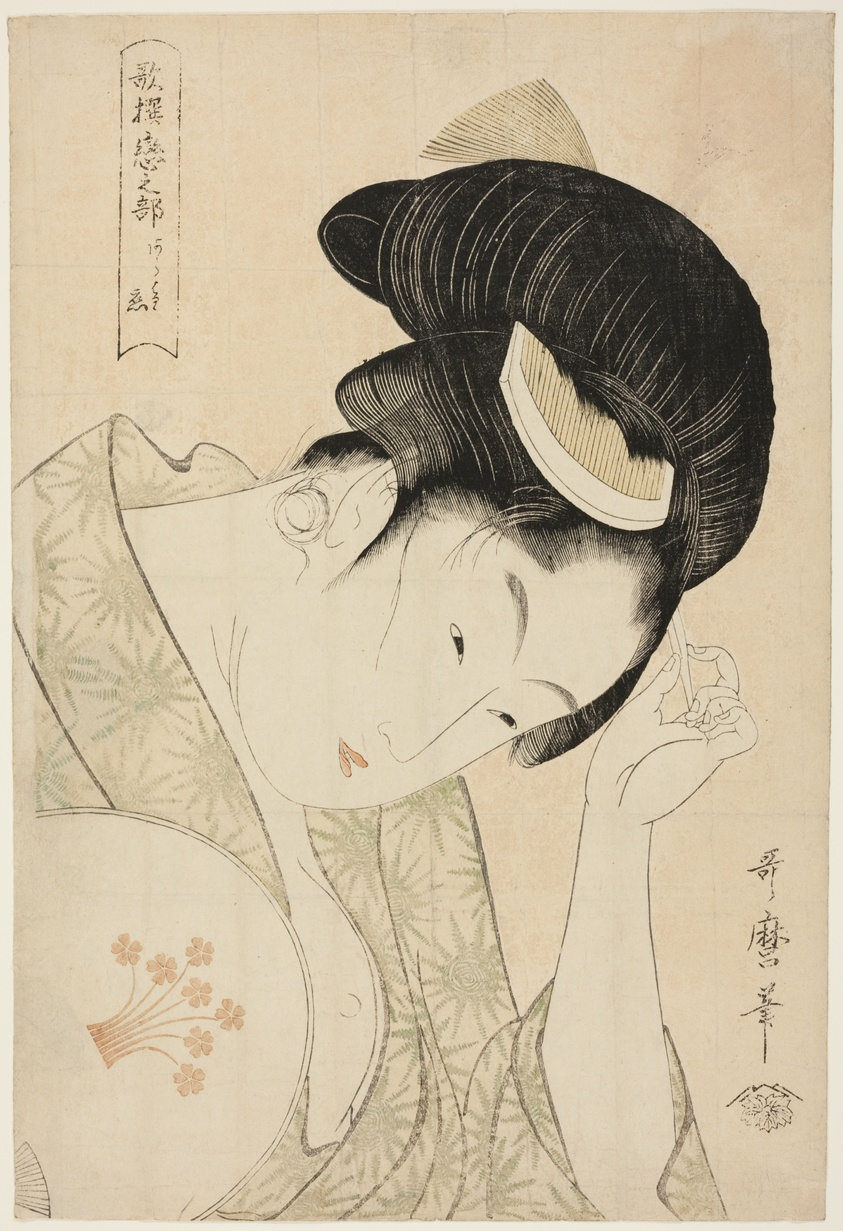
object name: Print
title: Obvious Love (Arawaruru koi), from the series "Anthology of Poems: The Love Section (Kasen koi no bu)"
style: Japanese (culture or style)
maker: Kitagawa Utamaro 喜多川 歌麿; Japanese, 1753 (?)-1806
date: c. 1793/94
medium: Color woodblock print; oban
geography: Japan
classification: woodblock print; print; asian art